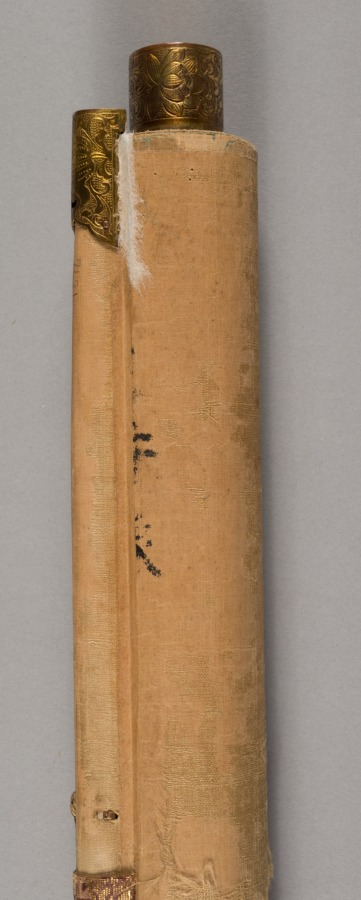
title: Monju with Five Hair Knots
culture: Japan, Kamakura period (1185–1333)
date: late 1200s–early 1300s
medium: Hanging scroll; ink, color, gold, and cut gold on silk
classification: Painting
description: This Buddhist painting shows Monju, Manjushri in Sanskrit, riding a lion. Monju is a bodhisattva, a being who, though enlightened, chooses not to become a Buddha but instead helps others achieve enlightenment. Monju’s youthfulness symbolizes his pure wisdom, unsullied by the world, and his five hair knots represent his vow to keep calamity at bay. The supernatural nature of his lion is emphasized by its hair, every strand painted in gold, as well as by the lotus platforms beneath each of its feet. The boy’s bejeweled body and silk finery is meant to resemble that of an Indian prince.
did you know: This painting is exemplary of the Kamakura period, known for artworks with special attention paid to the realism of images.